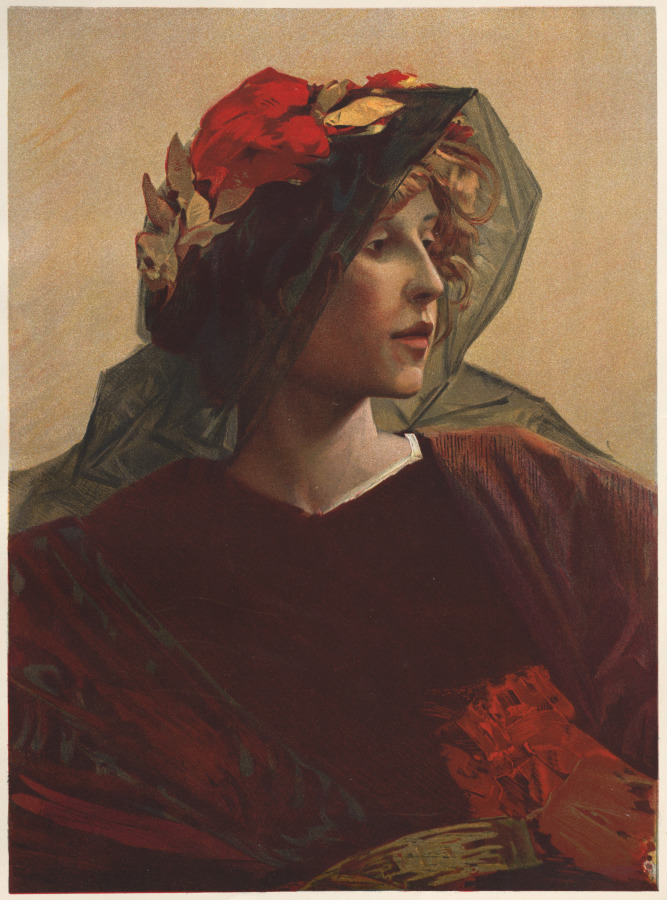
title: Impéria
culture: France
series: L'Estampe Moderne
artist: Alfred-Pierre Agache (French, 1843–1915)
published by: Imprimerie Champenois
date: c. 1899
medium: Color lithograph from bound volume containing 50 lithographs, each with a tissue paper guard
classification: Bound Volume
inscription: Lower right corner: blindstamp of l'Estampe Moderne (Lugt 2790)